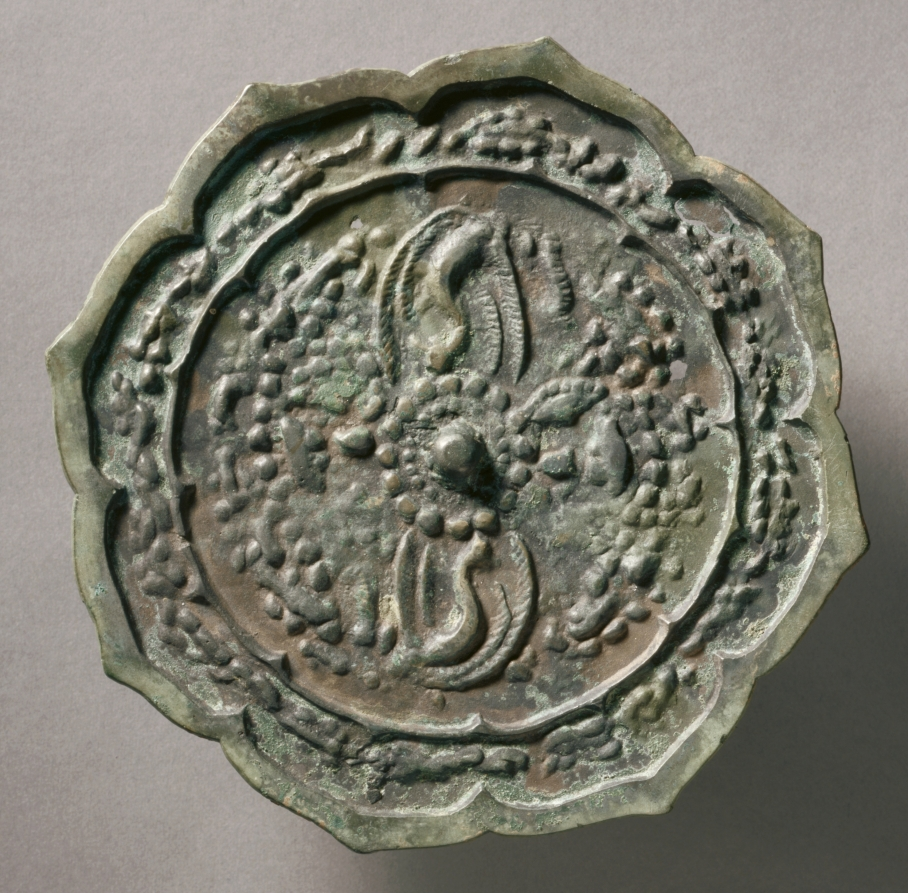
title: Octafoil Mirror with Avian and Floral Motifs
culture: China, Five dynasties (907-960)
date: early to mid 10th Century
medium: bronze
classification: Metalwork